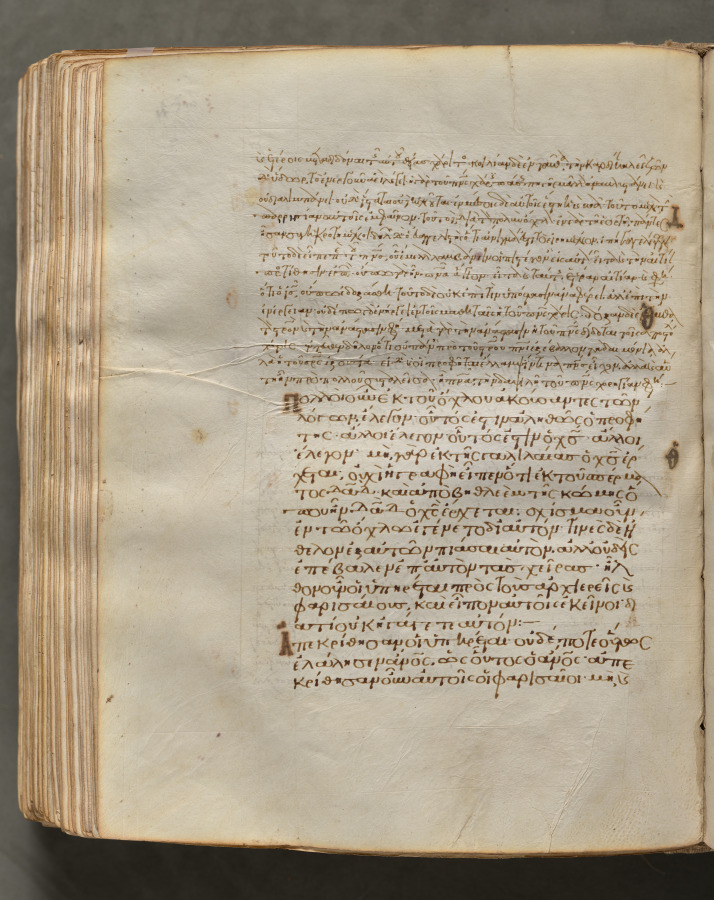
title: Text, folio 360 (verso), from a Gospel Book with Commentaries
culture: Byzantium, Constantinople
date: c. 1000–1100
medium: ink, tempera, and gold on vellum; leather binding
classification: Bound Volume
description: Each of the four gospels in this book opens on a page with brilliantly illuminated borders depicting the author of the text as well as birds—principally peacocks, symbols of the immortality of the soul—and fountains, representing the fountain of life and the salvation of the soul. This volume consists of 428 leaves with texts in Greek. Its level of sophistication suggests that it was probably written and decorated in a monastery in Constantinople.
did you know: Gospel books were carried in procession through Byzantine churches.